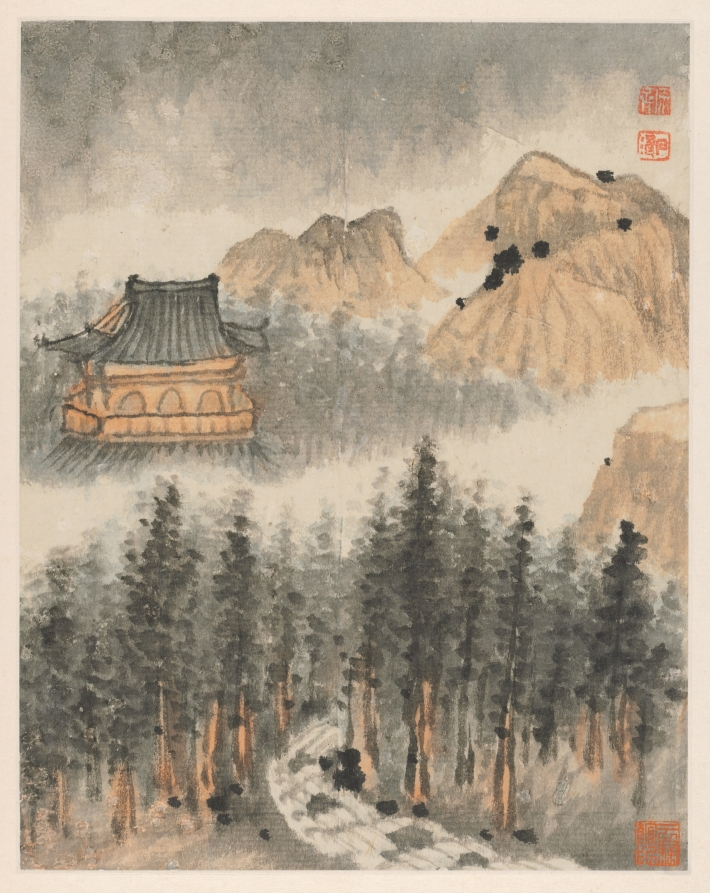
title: Reminiscences of Qinhuai River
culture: China, Qing dynasty (1644-1911)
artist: Shitao (Chinese, 1642–1707)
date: 1642–1707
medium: album leaf, ink and color on Song paper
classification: Painting